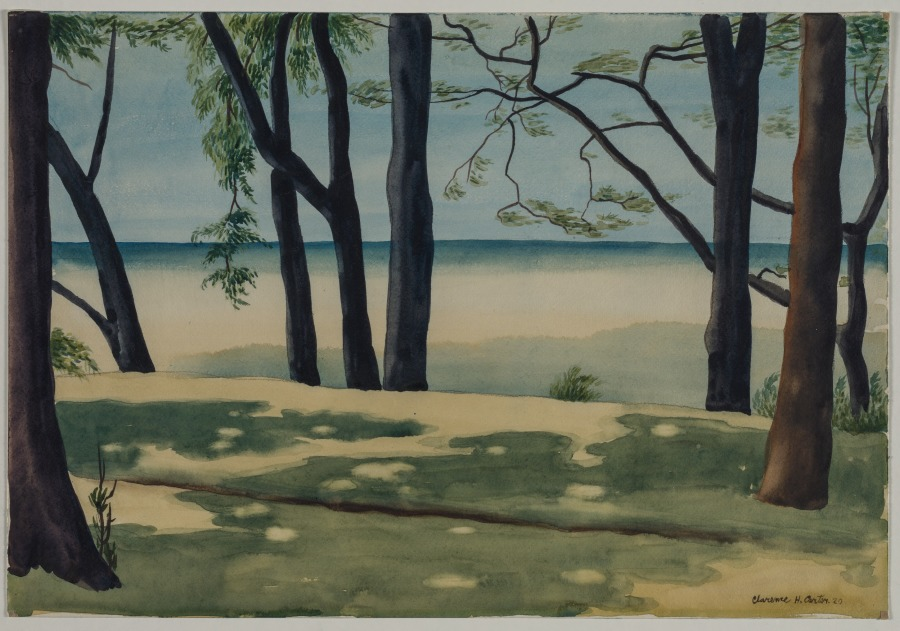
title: Mysterious Lake Patterns, Lake Erie (Study for Lake Erie Patterns)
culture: America, Ohio, Cleveland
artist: Clarence Holbrook Carter (American, 1904–2000)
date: c. 1930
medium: Watercolor with black chalk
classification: Drawing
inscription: Inscribed lower right, in brown watercolor: Clarence H. Carter. 20 Verso, upper left in graphite: Mysterious Lake Patterns, Lake Erie. 125